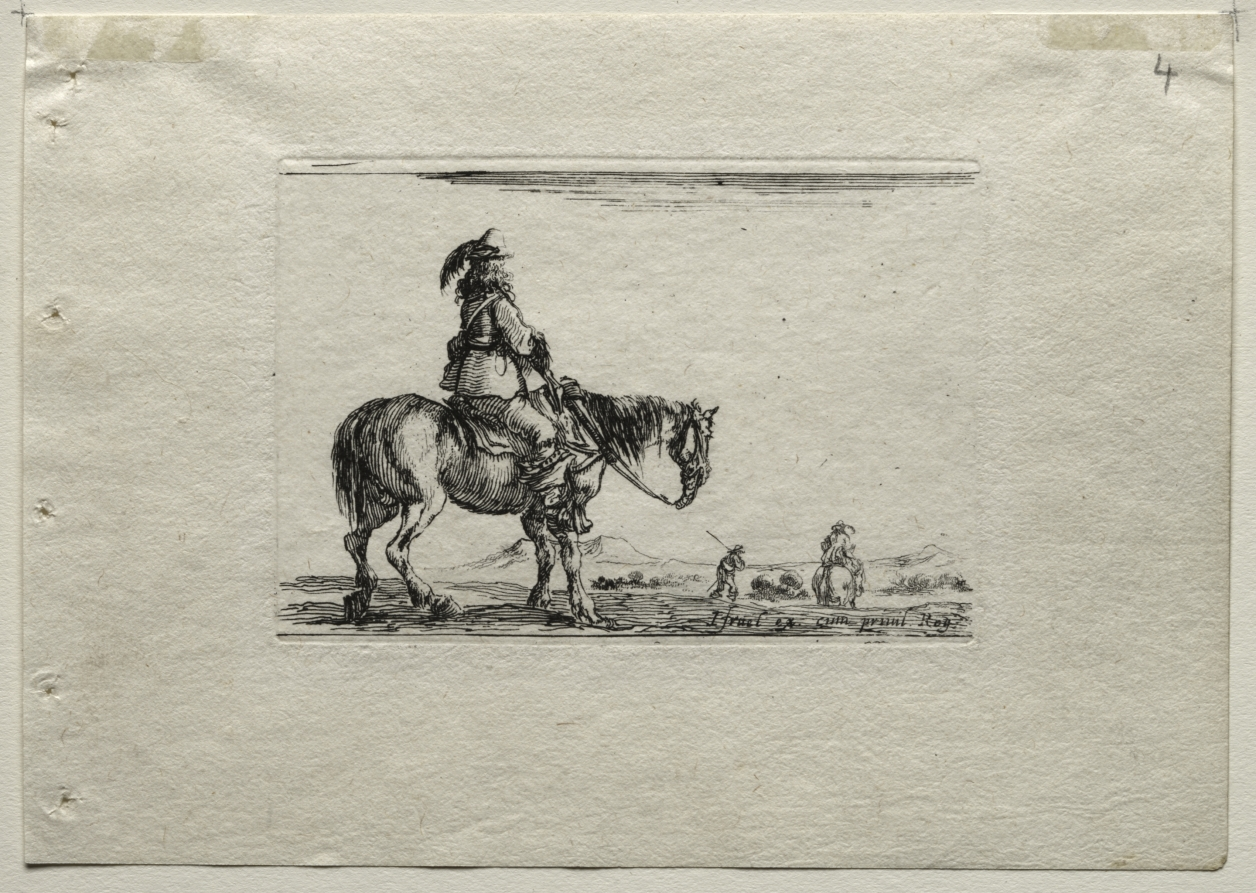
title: Caprices: Mounted Cavalier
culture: Italy, 17th century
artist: Stefano Della Bella (Italian, 1610–1664)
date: c. 1642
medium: etching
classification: Print